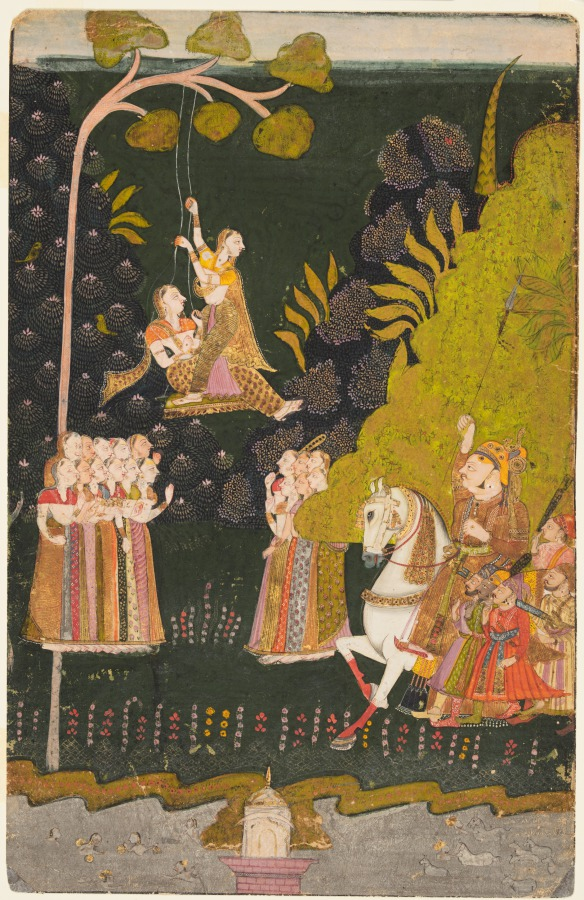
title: Maharaja Abhai Singh of Marwar (reigned 1724–49), Equestrian, Watching Girls Swinging at the Teej Festival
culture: Northwestern India, Rajasthan, Marwar region, Rajput kingdom of Jodhpur, court of Abhai Singh (reigned 1702–49)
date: c. 1740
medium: gum tempera and gold on paper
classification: Painting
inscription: 16. mārāja śrī abhai siṃgha jī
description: The festival of Teej is celebrated primarily by women in northern India and Nepal. The women sing and dance to welcome the monsoon season and observe fasts for the long life of their husbands. In the painting, two women can be seen playfully swinging on a tree branch while a group of women cheer for them.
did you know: A group of horses can be seen bathing in the pond.